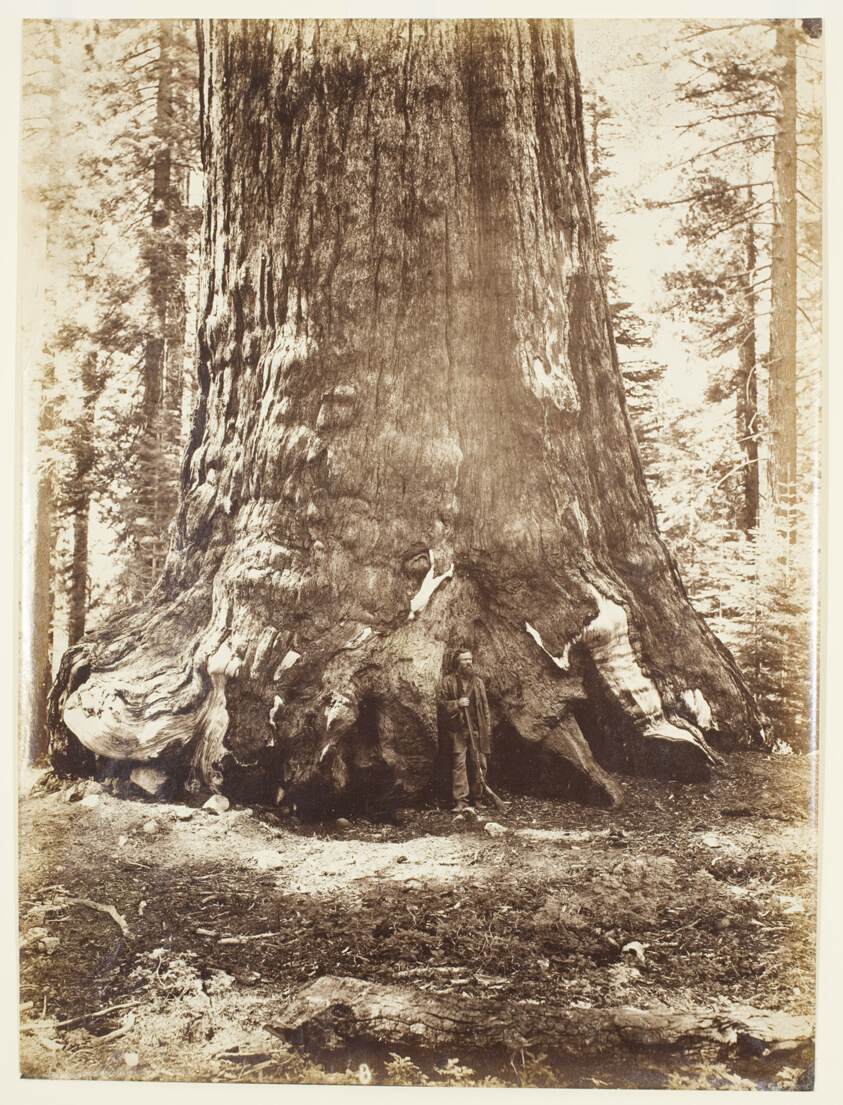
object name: Photograph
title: Section of the Grizzly Giant with Galen Clark, Mariposa Grove, Yosemite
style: 19th century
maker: Carleton E. Watkins; American, 1829-1916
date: 1865/66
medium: Albumen print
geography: United States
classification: albumen silver print; photographic process; photography; photograph